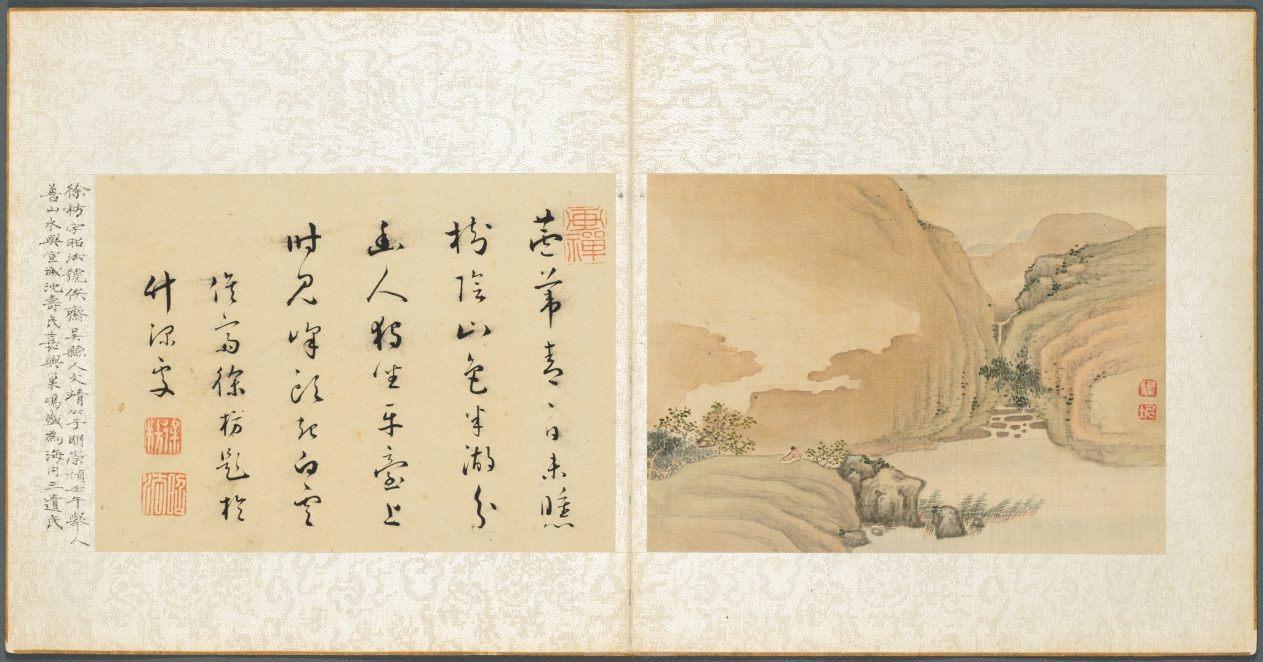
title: Album of Miscellaneous Subjects, Leaf 3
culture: China, Qing dynasty (1644-1911)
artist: Fan Qi (Chinese, 1616–after 1694)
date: early 1650s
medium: album leaf, ink and color on silk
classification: Painting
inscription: Artist seal: Fan Qi 樊圻. Poem by Xu Fang 徐枋 (1622–1694): Green are the reeds, the sun not yet set;/ Tree foliage and mountain colors divide the lake in two halves./ A solitary recluse sits upon a flat bluff,/ Occasionally observing white clouds rising from the mountain tops.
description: Fan Qi's painting for the third leaf of the album evokes Wang Wei's poetic line: Sit and watch the clouds rising. Xu Fang's calligraphic colophon reads: Green are the reeds, the sun not yet set; Tree foliage and mountain colors divide the lake into two halves. A solitary recluse sits upon a flat bluff, Occasionally observing white clouds rising from the mountain tops.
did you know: A waterfall descends between two mountains; the series of cascades is hinted by the careful placement of intermittent rocks.